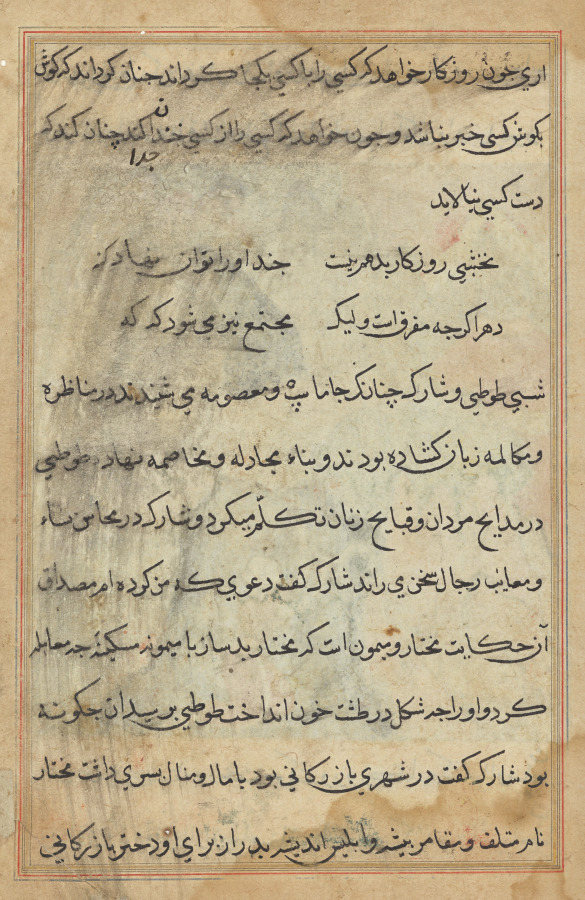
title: Text page from a Tuti-nama (Tales of a Parrot)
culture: Mughal India, court of Akbar (reigned 1556–1605)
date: c. 1560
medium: gum tempera, ink, and gold on paper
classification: Painting